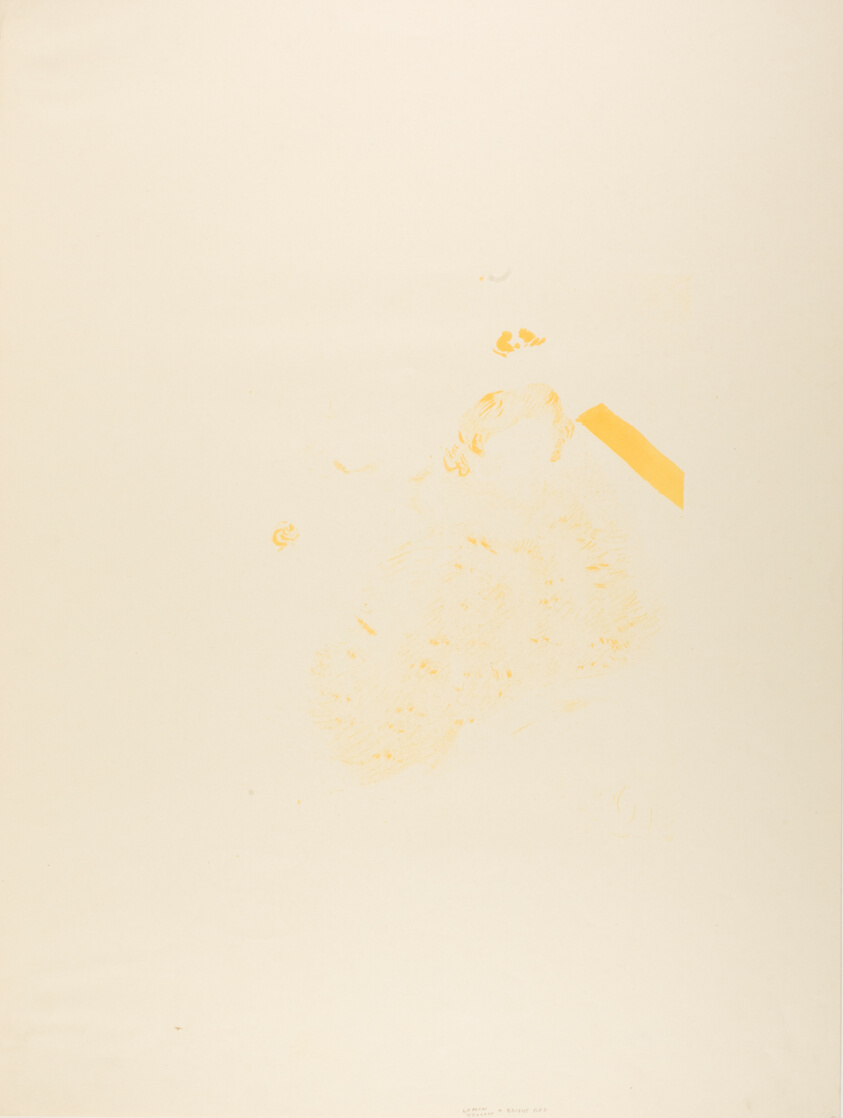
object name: Print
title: At the Concert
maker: Henri de Toulouse-Lautrec (French, 1864-1901)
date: 1896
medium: Color zincograph on cream wove paper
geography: France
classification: zincograph; print; prints and drawing